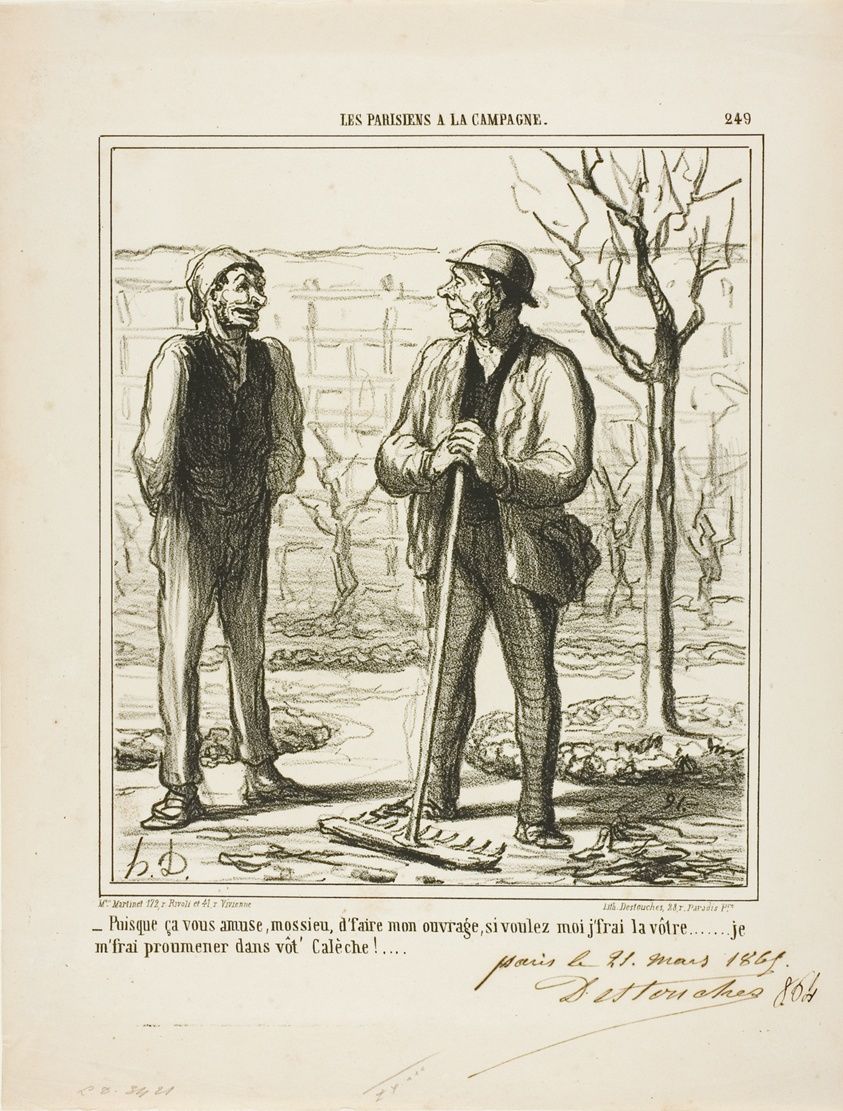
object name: Print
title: “- You seems to enjoy doing my work. In exchange I could offer doing your job: I will go for a ride in your coach!,” plate 249 from Les Parisiens A La Campagne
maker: Honoré Victorin Daumier; French, 1808-1879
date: 1865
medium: Lithograph in black on white wove paper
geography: France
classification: lithograph; print; prints and drawing